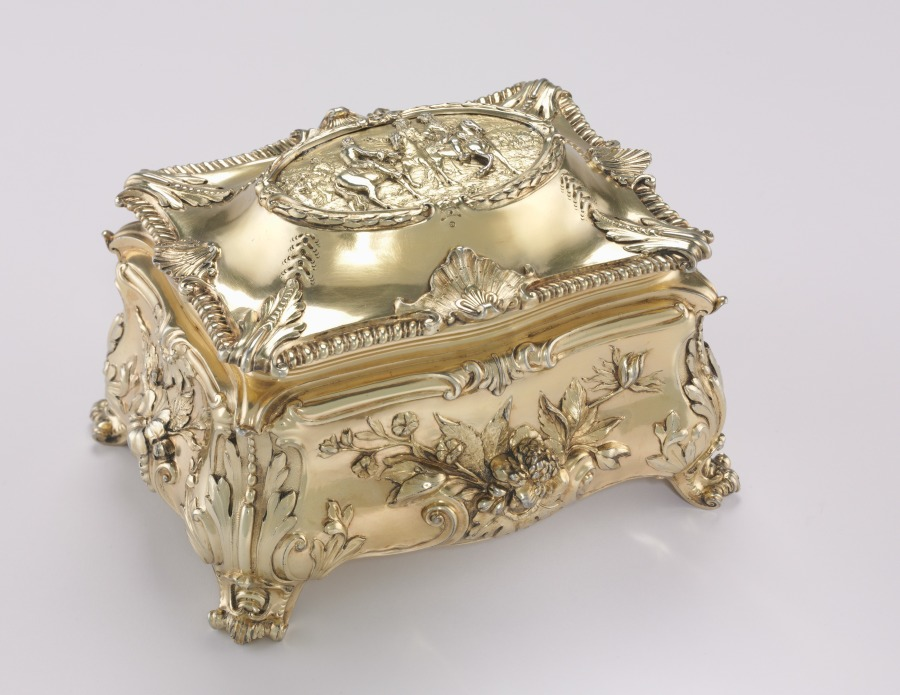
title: Box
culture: England, London, 18th century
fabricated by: Thomas Heming (British, 1722/23–1801)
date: 1771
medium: silver gilt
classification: Silver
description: Produced by King George III’s principal goldsmith, Thomas Heming, this silver gilt box closely resembles those he produced for the Queen of Denmark and the ladies of the British court in the 1760s. Adorning the hinged lid is an unidentified scene along with four scallop shells and acanthus leaves. Similarly, the curvilinear sides are ornamented with an array of swirling flora and serpentine lines.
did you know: This small box likely held jewelry and may have been accompanied by a mirror, scent bottles, brushes, combs, candlesticks, and small covered bowls on a wealthy woman’s dressing table.